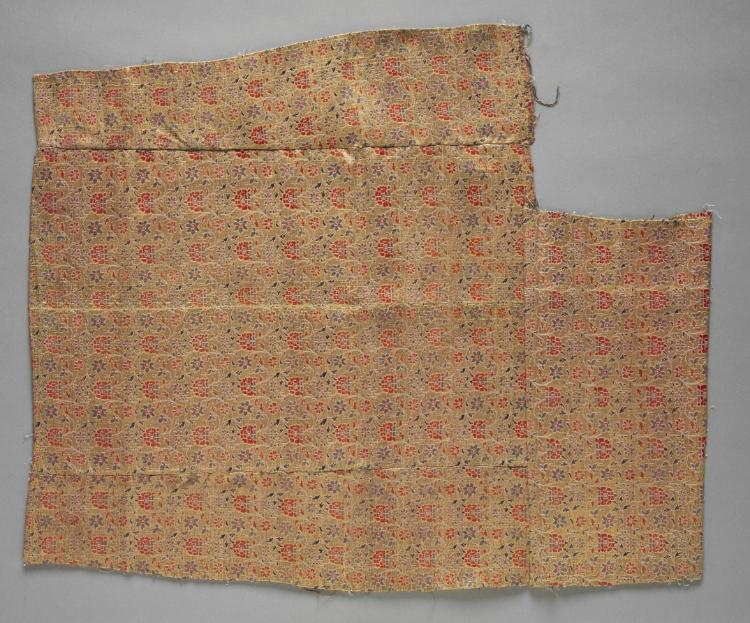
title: Fragments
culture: Iran, 18th century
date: 1700s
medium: silk, brocaded, with metal thread weft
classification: Textile